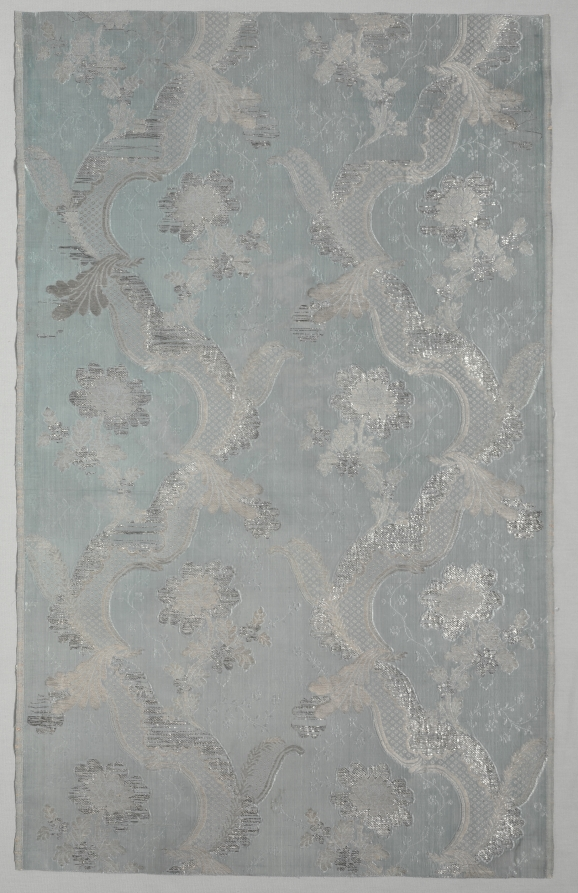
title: Length of Textile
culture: France, 18th century, Period of Louis XV (1723-1774)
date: 1723–1774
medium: plain compound cloth, brocaded; silk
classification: Textile